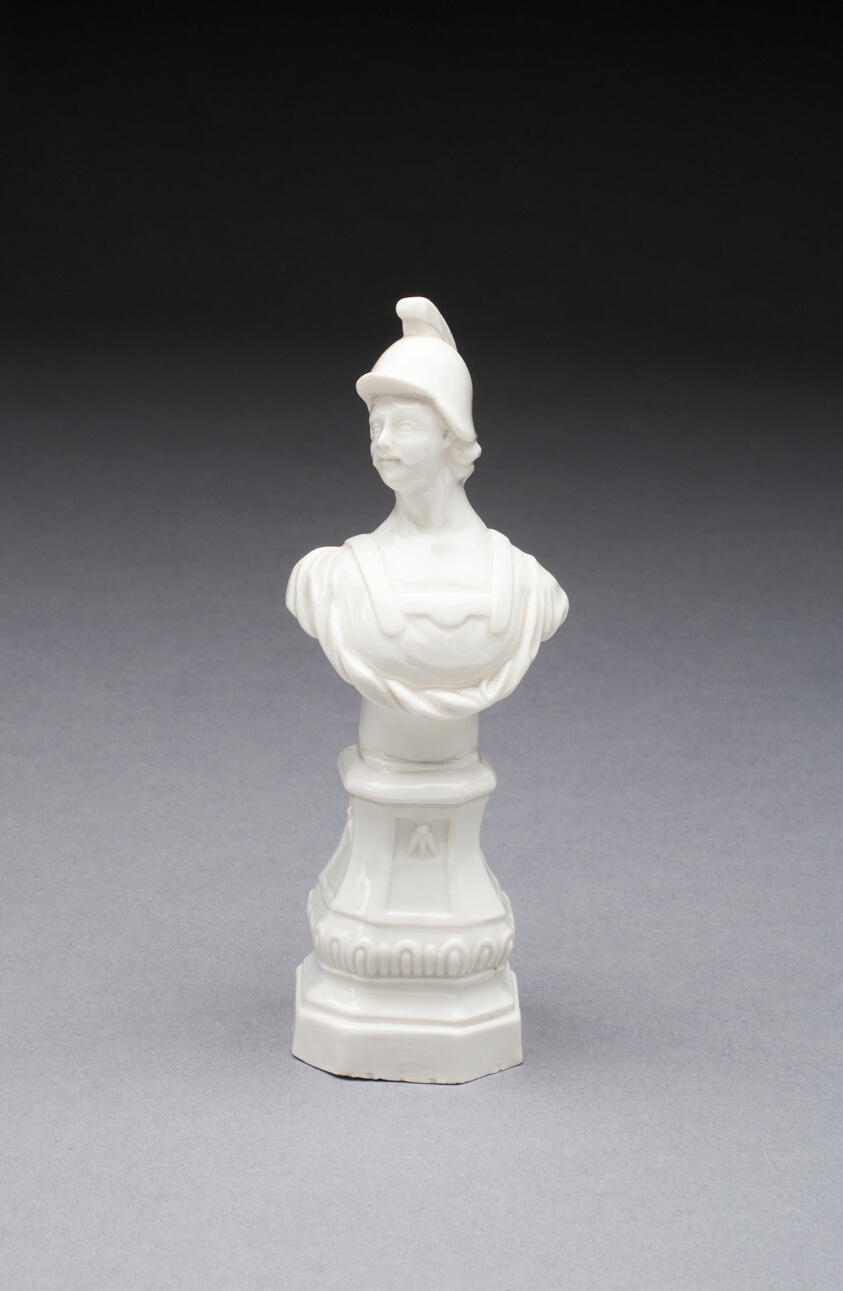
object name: Ceramics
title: Chess Piece: Knight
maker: Höchst Factory; German, founded 1746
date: 1762/96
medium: Hard-paste porcelain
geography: Höchst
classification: porcelain; european decorative arts; ceramics